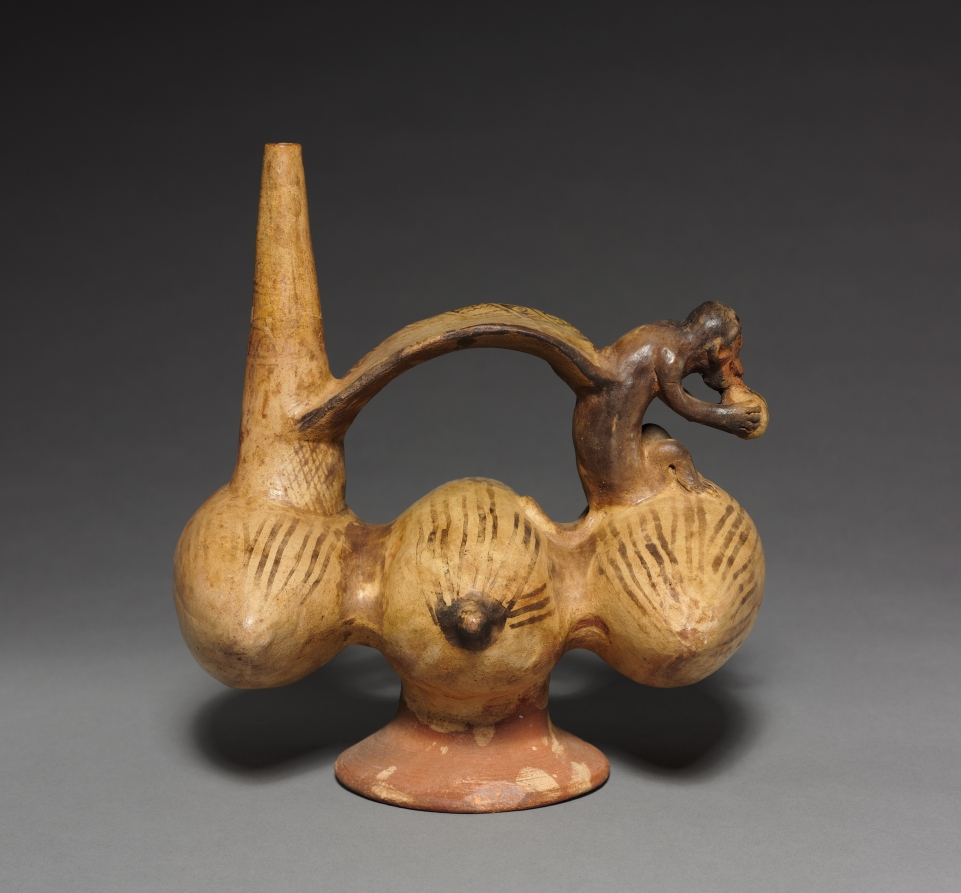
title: Stirrup Jar with Monkey and Three Fruits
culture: Peru, North Coast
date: 1000 or later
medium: red earthenware decorated with cream-colored slip and brown pigment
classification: Ceramic